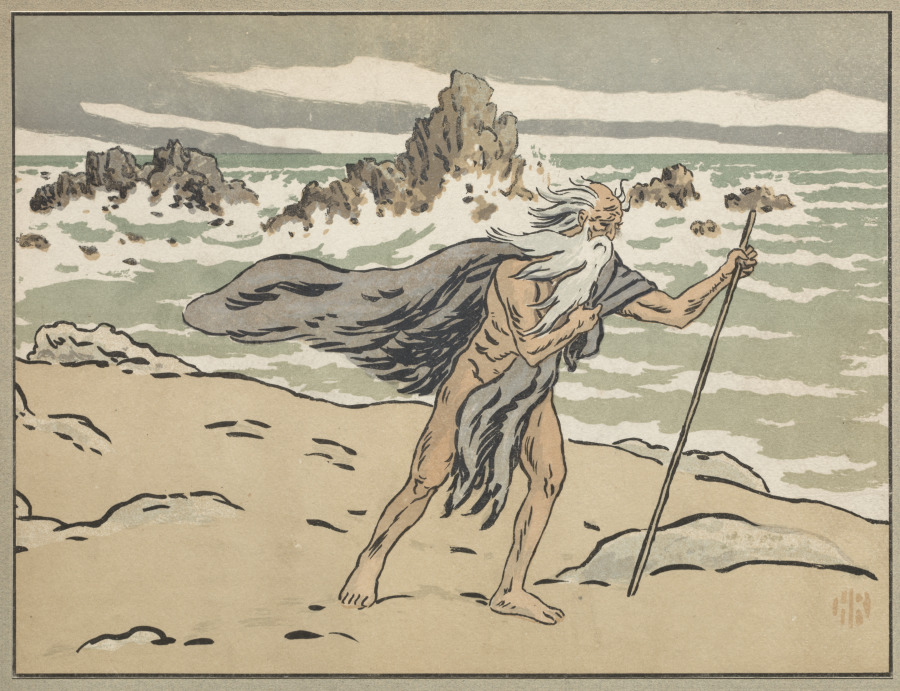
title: The Wandering Jew: Cover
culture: France, 19th century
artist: Henri Rivière (French, 1864–1951)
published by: Verneau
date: 1896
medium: color lithograph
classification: Portfolio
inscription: title page is signed, in blue crayon: Henri Rivière